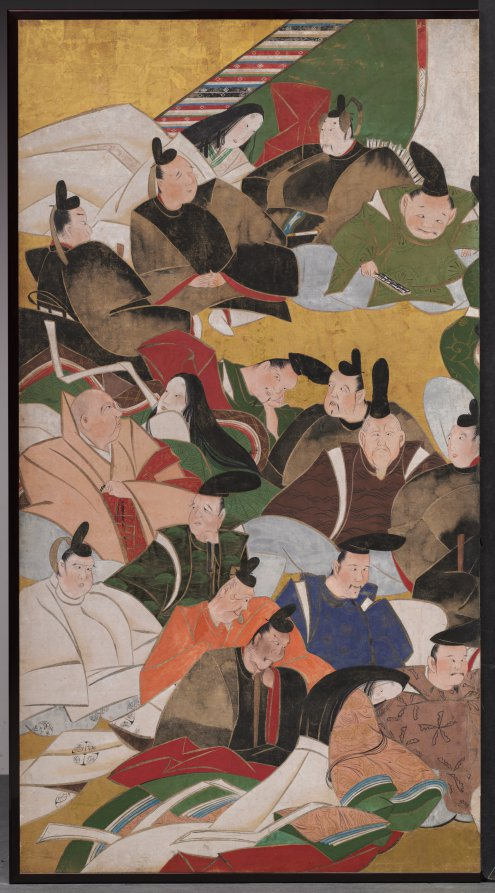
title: Thirty-Six Poetic Immortals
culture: Japan, Edo period (1615–1868)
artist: attributed to Tatebayashi Kagei (Japanese, active mid-1700s)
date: mid 1700s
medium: two-fold screen; ink, color, and gold on paper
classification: Painting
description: Fujiwara no Kintō (996–1075), a Japanese courtier, scholar, and poet, compiled select examples by the most celebrated composers of 31-syllable poems (waka) from the 600s to the 1000s. Painters soon made these “thirty-six poetic immortals” a favorite subject, traditionally presenting the poets in sequential, idealized portraits paired with their poems. In this interpretation, a chronologically impossible gathering of these great talents is in progress. The screen’s composition follows one devised by design virtuoso Ogata Kōrin (1658–1716).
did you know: The green surface edged with stripes at the upper left of the painting represents tatami matting with a silk border.